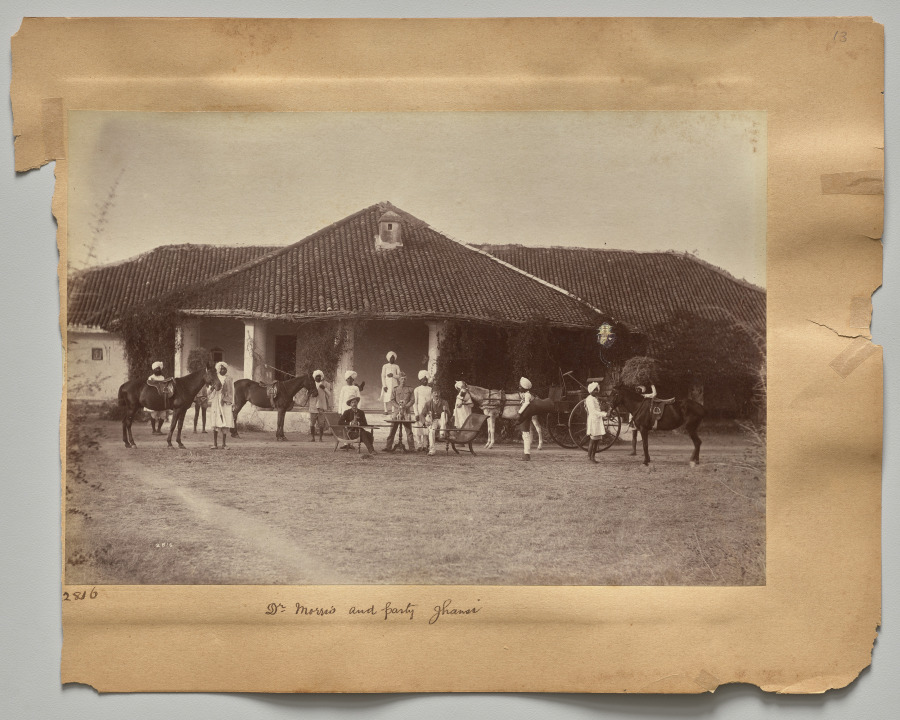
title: Dr. Morris and party, Jhansi (recto)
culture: India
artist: Raja Deen Dayal (Indian, 1844–1905)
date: c. 1882–87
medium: albumen print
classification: Photograph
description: These photographs are part of an album, now disassembled, of around 105 photographs taken in India between 1885 and summer 1887 that provide glimpses into the lives of the British colonial elite and royal and upper-class Indians. The museum holds another group of 37 pictures from this album (2016.266), which was probably commissioned by a British civil servant visiting or working in India around 1888 as a personal souvenir of his experiences there.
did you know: Raja Deen Dayal is regarded now, and was considered during his lifetime, to be India’s most important 19th-century photographer.